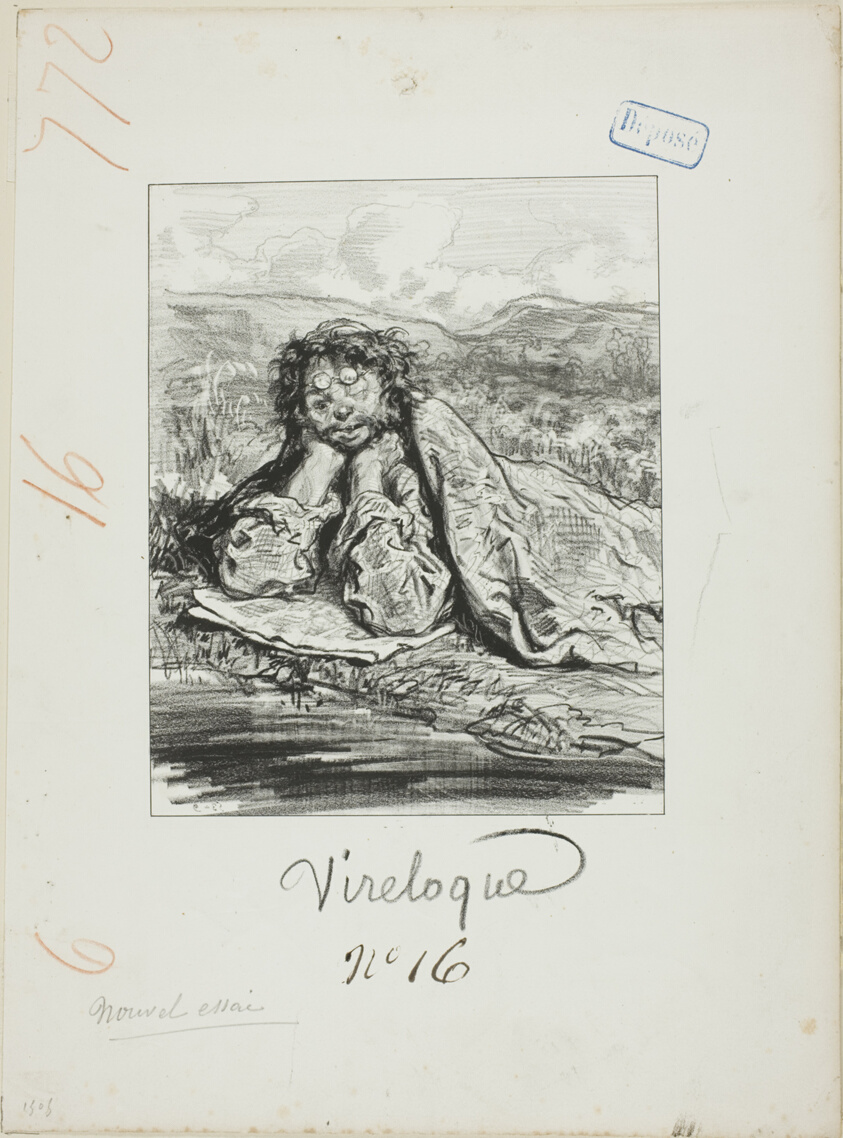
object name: Print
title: Les Propos de Thomas Vireloque: Young Europe (60 years old! - and worn out)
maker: Paul Gavarni (French, 1804-1866)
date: 1853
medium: Lithograph in black on cream wove paper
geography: France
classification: lithograph; print; prints and drawing